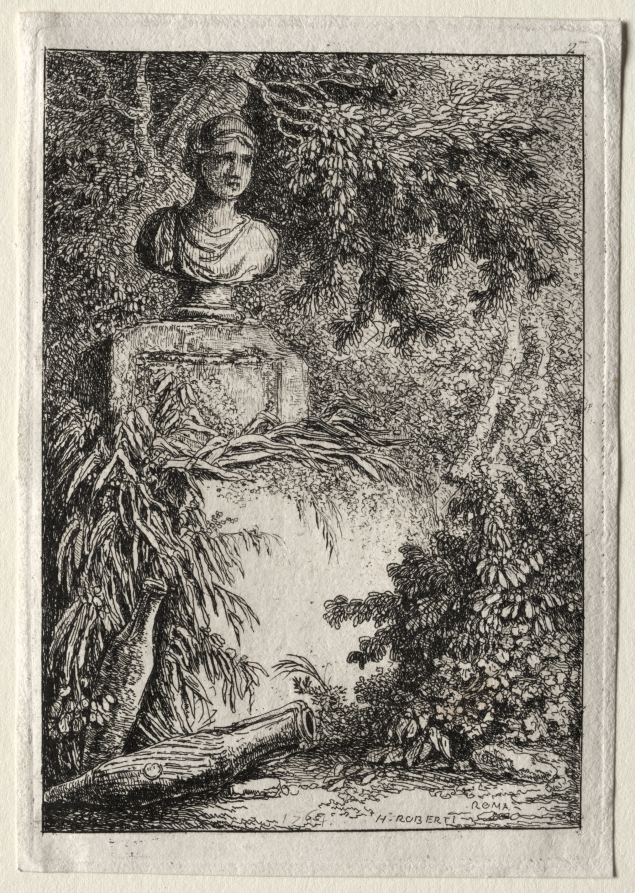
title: Les Soirées de Rome: Le Buste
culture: France, 18th century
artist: Hubert Robert (French, 1733–1808)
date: 1764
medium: etching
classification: Print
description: Derived from his own pen-and-ink drawings, this suite of etchings features fictional characters situated near recognizable buildings and statues in Rome. On the title page, Robert dedicated the suite to Marguerite Le Compte, who visited Rome in 1764 in the company of the wealthy author and art enthusiast Claude Henri Watelet. Both Le Compte and Watelet were amateur etchers, and they socialized with a group that included artists and printmakers centered at the academies in Italy. Robert’s dedication was likely motivated by the hope of future patronage from Le Compte. She may be the generous woman with a hand muff depicted in The Ancient Temple, the fifth scene in this series.